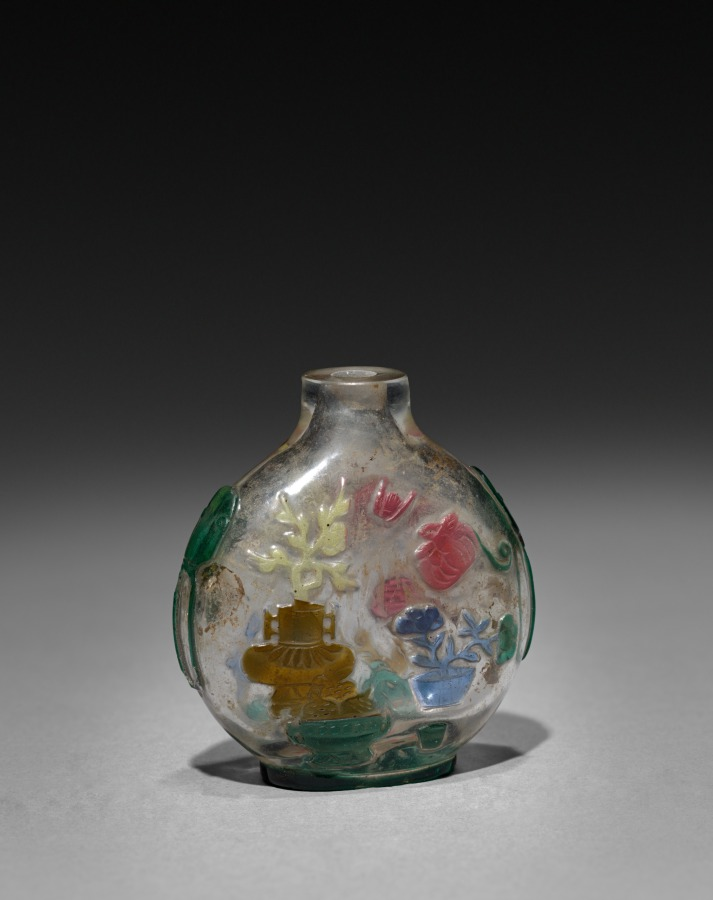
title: Snuff Bottle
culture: China, Qing dynasty (1644-1911)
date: 1644–1911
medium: glass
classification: Glass